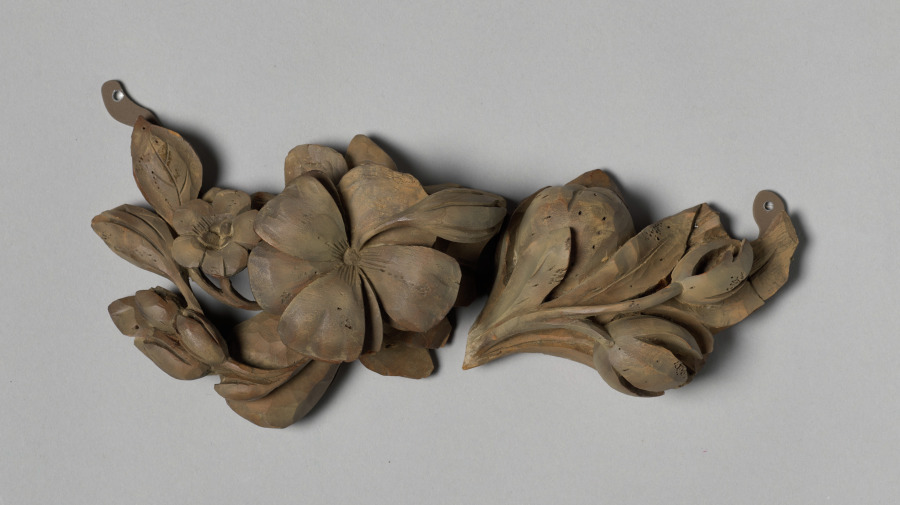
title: Carving from an Overmantel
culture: England, 17th century (Charles II)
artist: Grinling Gibbons (British, 1648–1721)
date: c. 1675–1677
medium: lindenwood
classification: Sculpture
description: See cover record.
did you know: The swags of fruit and foliage featured in this wooden overmantel decoration evoke the bounty of the English countryside.